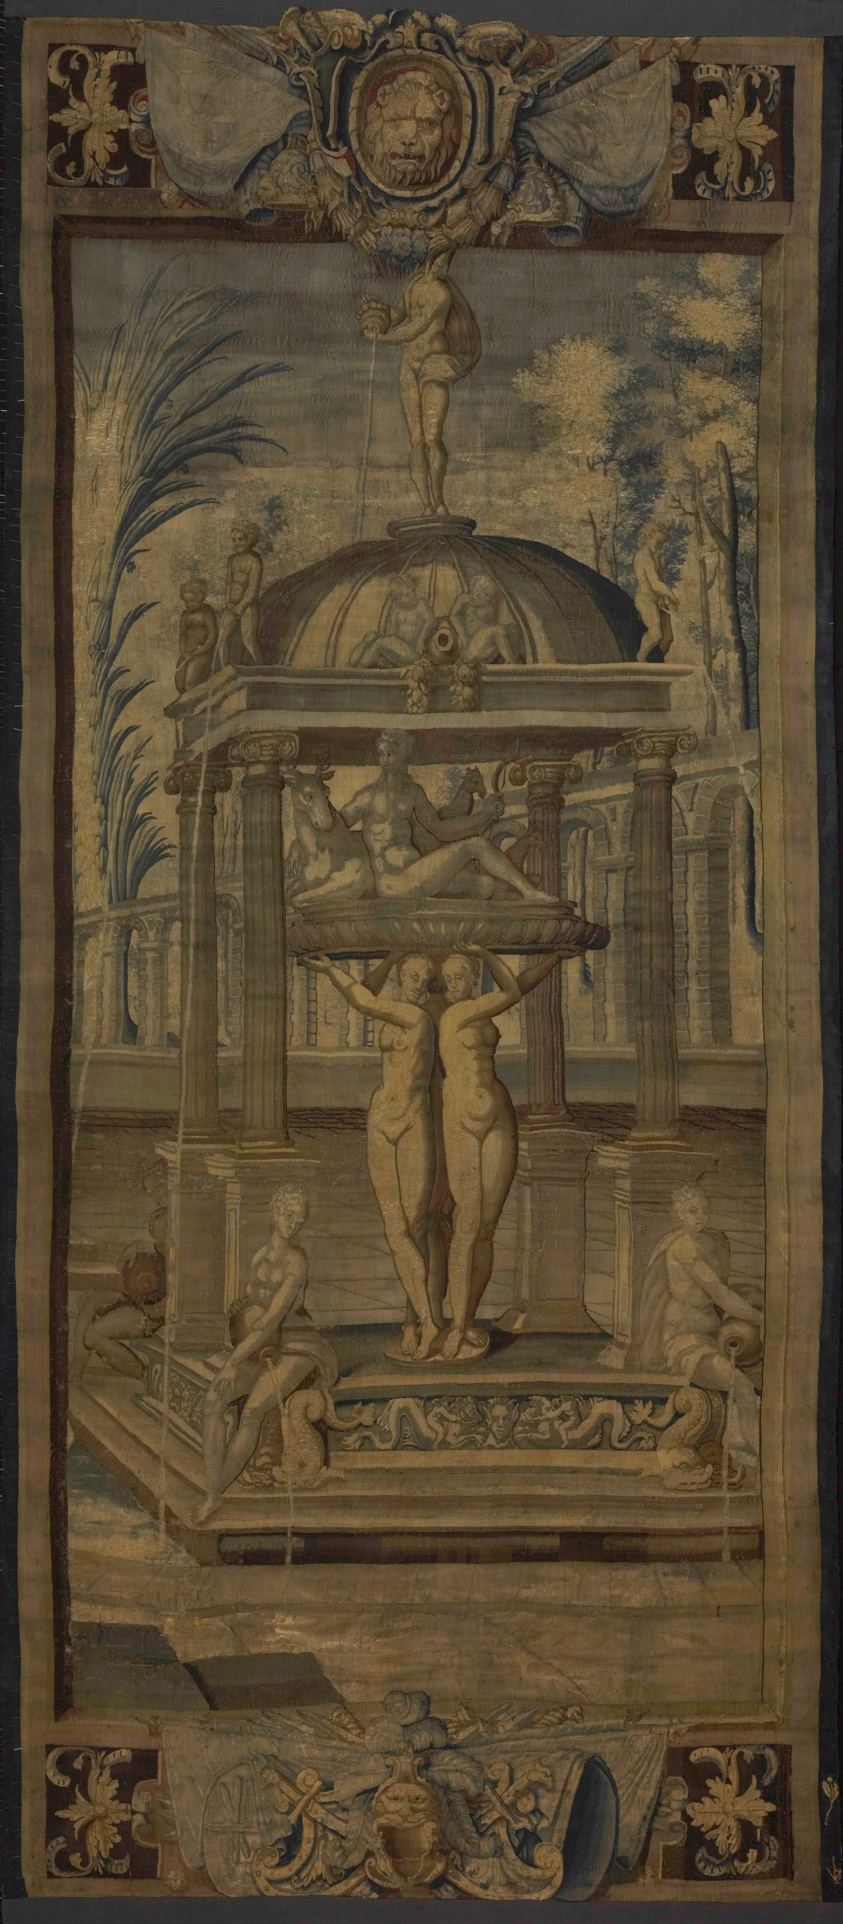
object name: Coverings and Hangings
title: The Petitions [right part]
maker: After a design by Antoine Caron (1521–1599); Woven at an unknown workshop at the Manufacture du Faubourg Saint-Marcel; France, Paris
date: 1607/30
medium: Wool and silk, slit and double interlocking tapestry weave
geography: France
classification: weaving - tapestry; textile